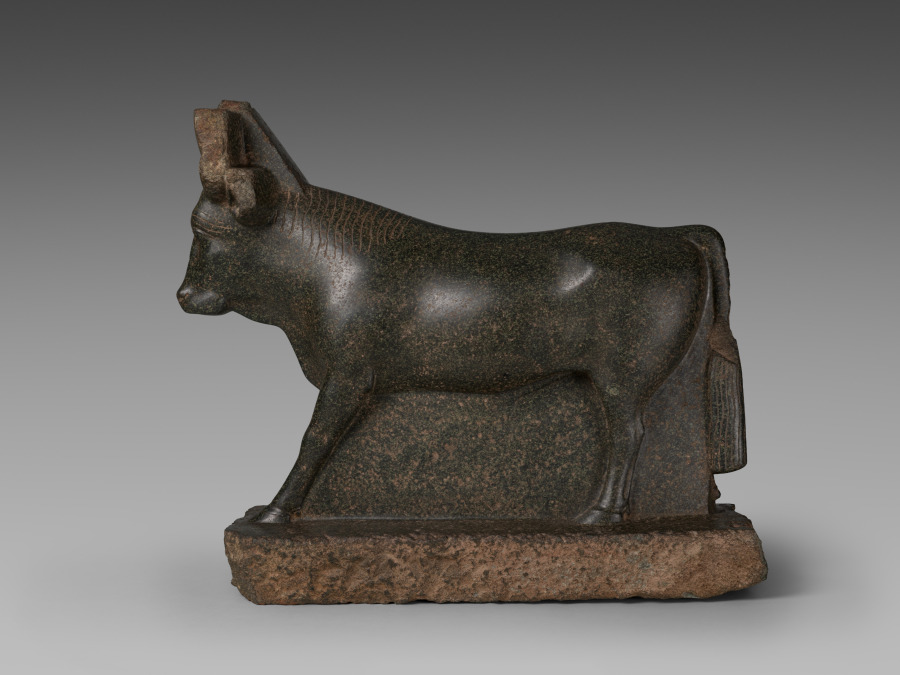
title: Apis Bull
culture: Egypt, Greco-Roman period (332 BCE–395 CE), Ptolemaic dynasty (305–30 BCE)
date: 400–100 BCE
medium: serpentinite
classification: Sculpture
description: Sacred animal cults have a long history in ancient Egypt, but they became even more important in the Ptolemaic and Roman periods. Because each god could incarnate himself into any animal species, beasts of all sorts--dogs, cats, ibises, crocodiles--were protected, venerated, mummified, and collected by the thousands in specialized animal cemeteries. The sacred bull cults were different. Apis, the bull of Memphis, was a god in his own right. But he was also associated with other deities, such as Ptah, the god of Memphis, and Osiris, in the form of Osiris-Apis (or Serapis). Statues and reliefs always show him crowned with a sun disk and cobra. When an Apis bull died, he was given a burial fit for a king in an area of the Memphite cemetery known as the Serapeum.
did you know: A larger base, likely inscribed, may have hidden the rough, unfinished lower edges of this statue.